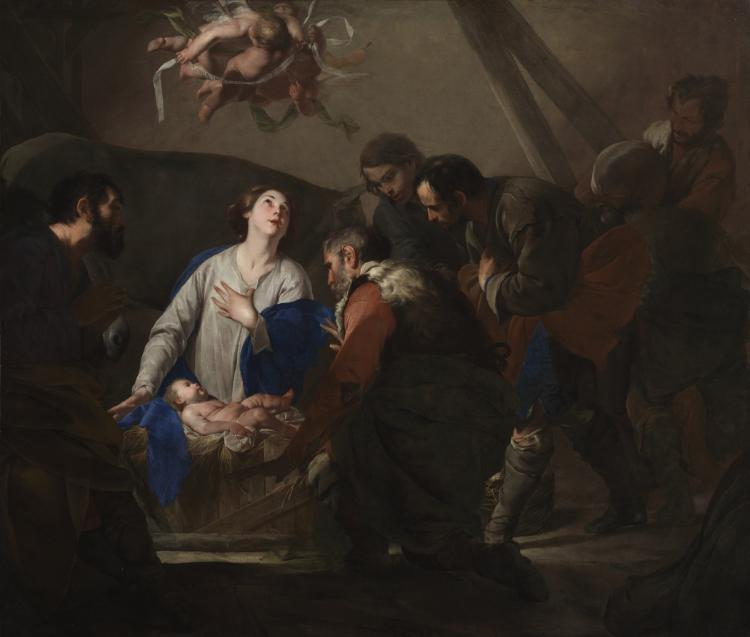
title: Adoration of the Shepherds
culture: Italy, 17th century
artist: Bernardo Cavallino (Italian, 1616–1656)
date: c. 1650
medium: oil on canvas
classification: Painting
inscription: Signed left on ox: "BC [monogram]"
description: Cavallino worked in Naples where he was not well known during his lifetime, but was alert to the work of contemporaries whose innovations he transformed with extraordinary delicacy and charm. The adoration of the shepherds is a traditional subject, but here Cavallino shows it in a new light. The focus is on Mary, indicating that she alone is aware of the angels who flutter above with ribbons proclaiming Gloria in Excelsis Deo (Glory to God in the highest). Joseph and the shepherds stolidly regard the child, but the sweetness of Mary's expression simultaneously reveals her love, pride, and humility.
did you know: The artist signed this painting with his monogram “BC” on the rump of the ox.